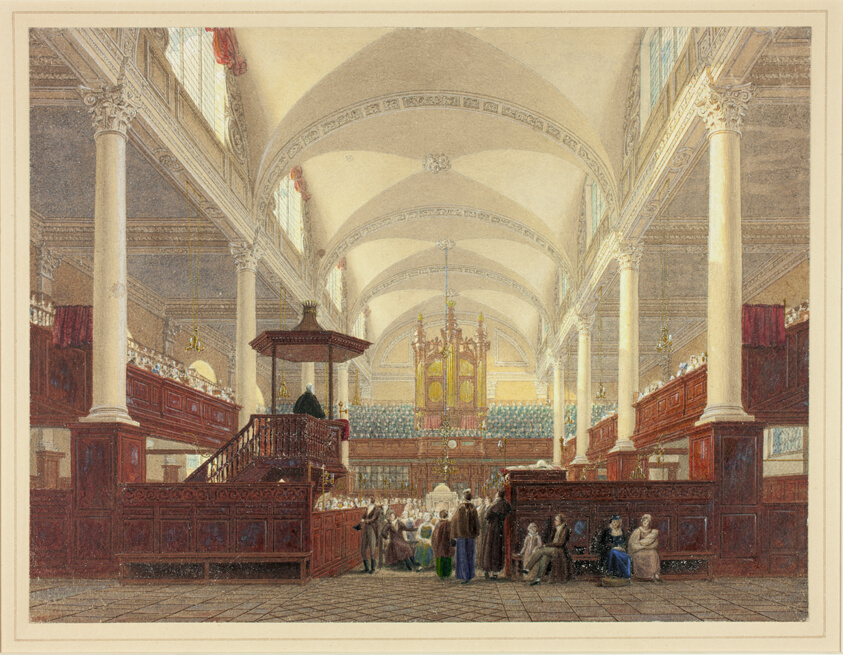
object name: Drawing and Watercolor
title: Interior of Christ Church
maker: Frederick MacKenzie (English, born Scotland, 1787-1854)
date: c. 1816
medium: Watercolor, with touches of gouache, heightened with white gouache, over graphite, on cream wove paper, laid down on cream wove paper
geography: England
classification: watercolor; drawings (visual works); prints and drawing